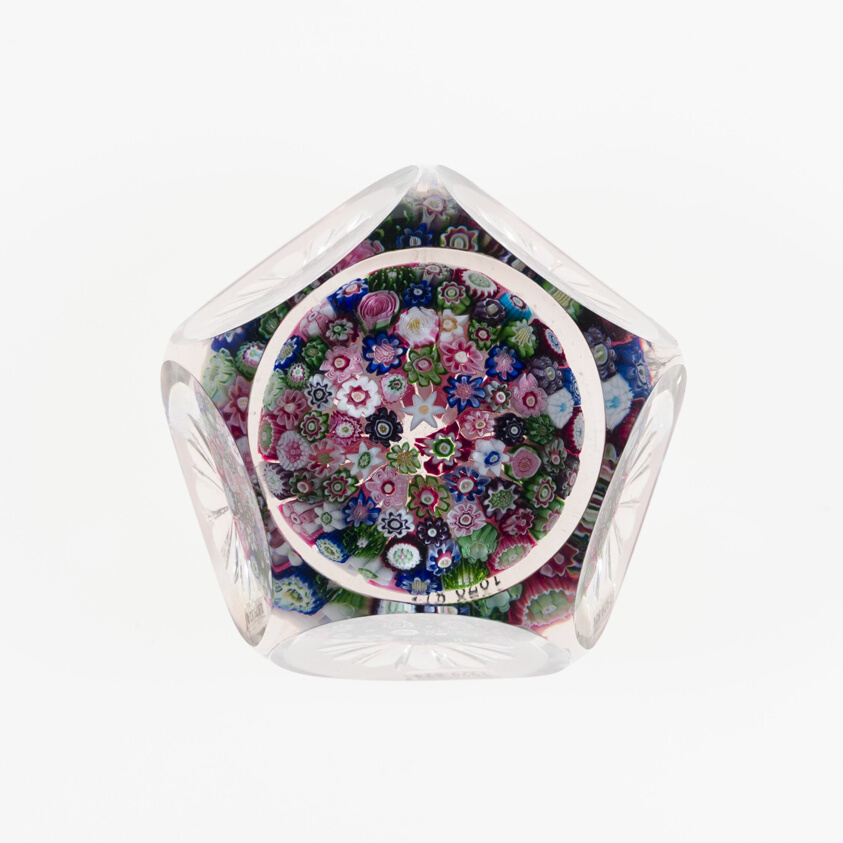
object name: Glass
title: Paperweight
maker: Clichy Glassworks (Cristalleries de Clichy); Clichy, France, 1837-1885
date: c. 1845–55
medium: Glass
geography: Clichy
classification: paperweight; millefiori; european decorative arts; glass